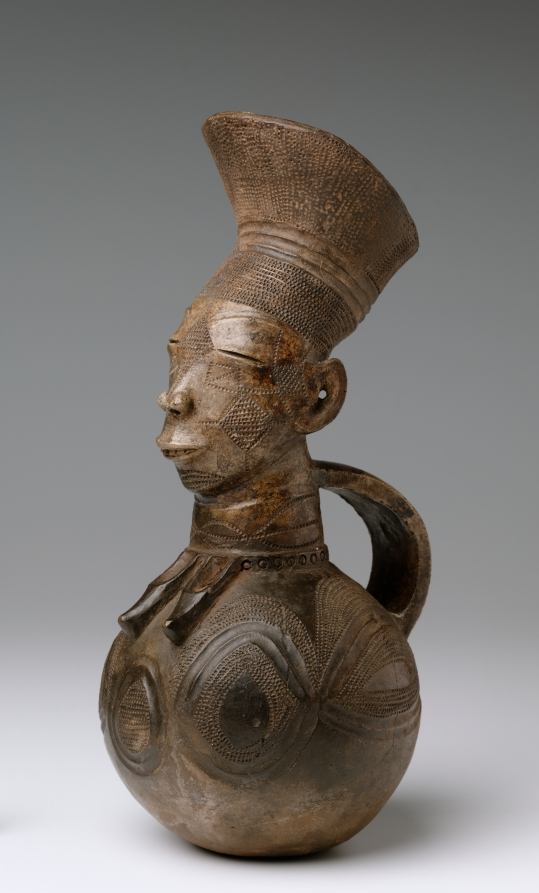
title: Vessel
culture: Central Africa, Democratic Republic of the Congo, Mangbetu, early 20th century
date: early 1900s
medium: terracotta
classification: Vessels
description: Women were and still are responsible for the making of terracotta pots among the Mangbetu. It seems, however, that men added the figurative elements that embellish examples like the one shown here. The depicted head with its elongated skull and halolike coiffure imitates the cranial deformation and hairstyle fashionable among female Mangbetu royalty at the beginning of the 20th century. Typically used for wine, many vessels were also explicitly made for sale to foreigners.